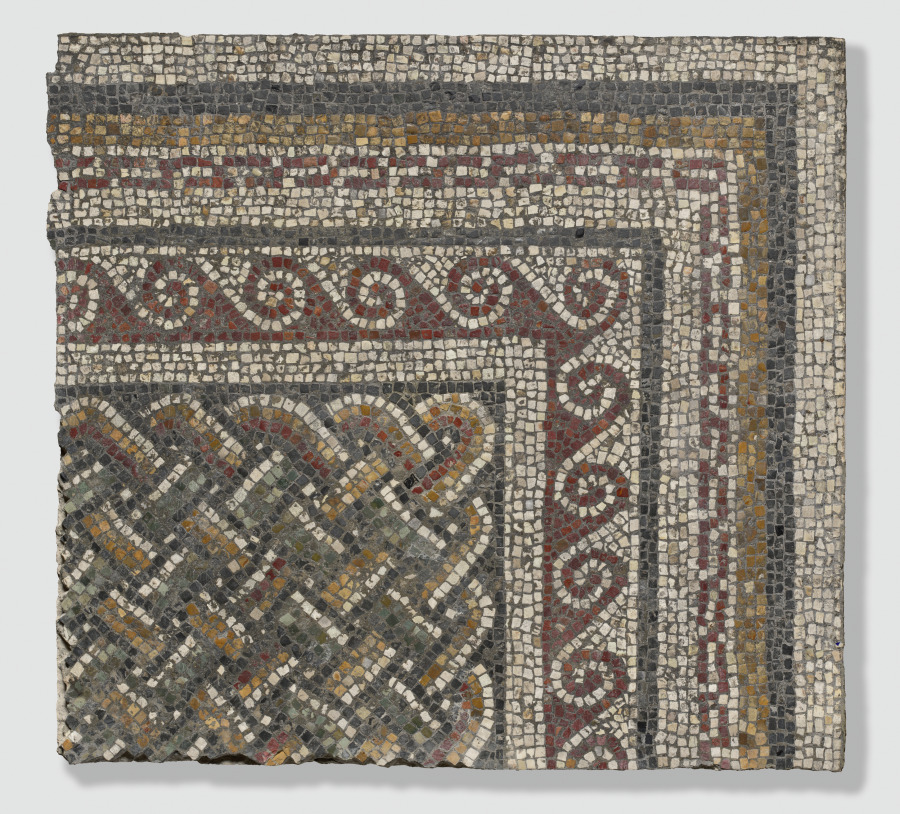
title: Mosaic Pavement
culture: Italy, Roman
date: 1–100 CE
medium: stone mosaic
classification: Stone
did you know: This mosaic floor was originally installed in the interior garden court and was on view from 1918 to 1965.